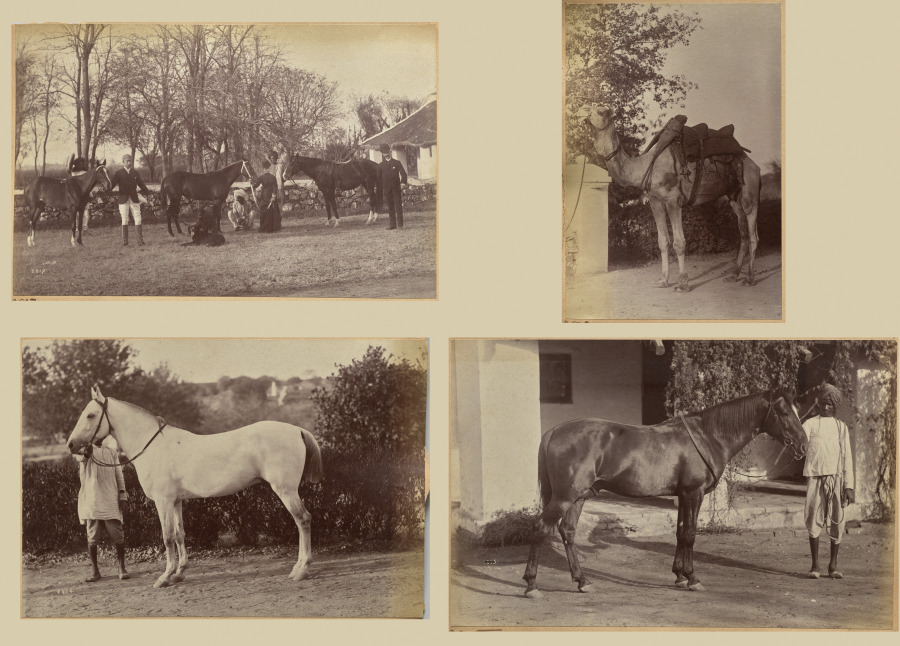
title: Captain Brown's horses, Jhansi (recto, top); Captain Bailward's horses (recto, bottom); Captain Bailward's camel (verso, left); Captain Bailward's horse, Jhanso (verso, right)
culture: India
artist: Raja Deen Dayal (Indian, 1844–1905)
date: c. 1882–87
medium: albumen print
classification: Photograph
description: These photographs are part of an album, now disassembled, of around 105 photographs taken in India between 1885 and summer 1887 that provide glimpses into the lives of the British colonial elite and royal and upper-class Indians. The museum holds another group of 37 pictures from this album (2016.266), which was probably commissioned by a British civil servant visiting or working in India around 1888 as a personal souvenir of his experiences there.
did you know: Raja Deen Dayal is regarded now, and was considered during his lifetime, to be India’s most important 19th-century photographer.